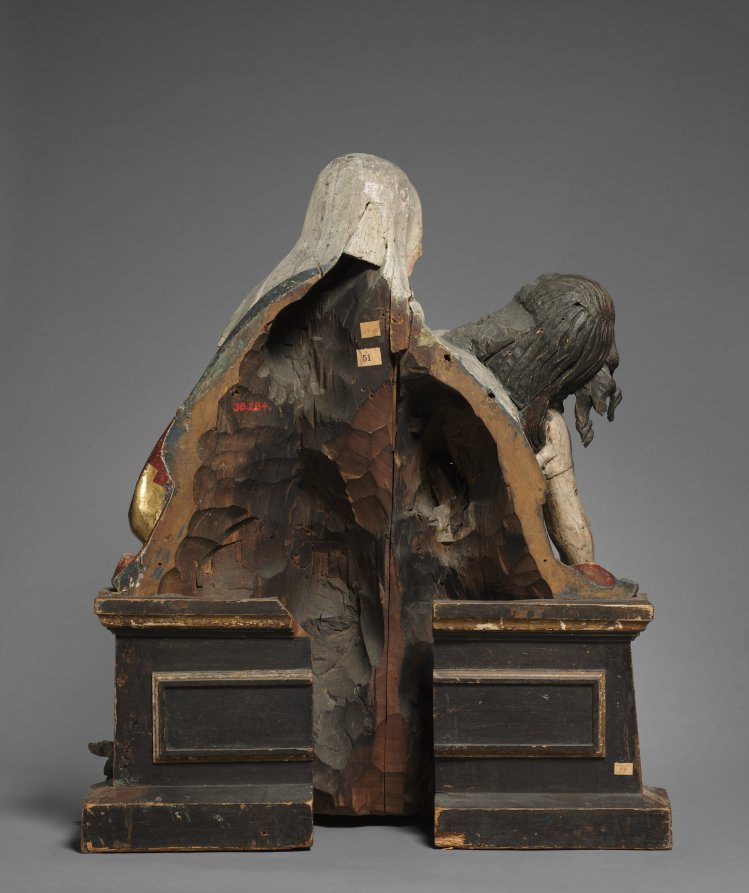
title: Vesperbild (Pietà)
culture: Germany, Upper Bavaria, 16th century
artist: Master of Rabenden (German)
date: c. 1515–20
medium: lindenwood, polychromed and gilded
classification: Sculpture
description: Depicting the Virgin cradling Christ’s dead body, works like this one were known in German as vesperbilds, owing to their incorporation into the liturgy of the evening prayer (vespers) on Good Friday. The word pietà—from the Latin pietas, meaning "piety" or "compassion"—was also used to describe such works. Like other devotional image types that emerged in southern Germany in the later medieval period, vesperbilds encouraged viewers to contemplate Christ’s suffering and empathize with the Virgin’s sorrows more directly and emotively than ever before. This anonymous German artist is named after one of his most important works, the high altar of the church of Rabenden in the Chiemgau, the foothills of the Alps. The sculpture was likely placed in a secondary chapel in a Bavarian church.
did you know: This sculpture sensitively depicts the Virgin cradling the body of Christ. This devotional image was likely placed near the altar in a German chapel. Imagine standing in a small, quiet chapel looking up at these lifelike figures with flickering candles casting dappled light onto their surface.